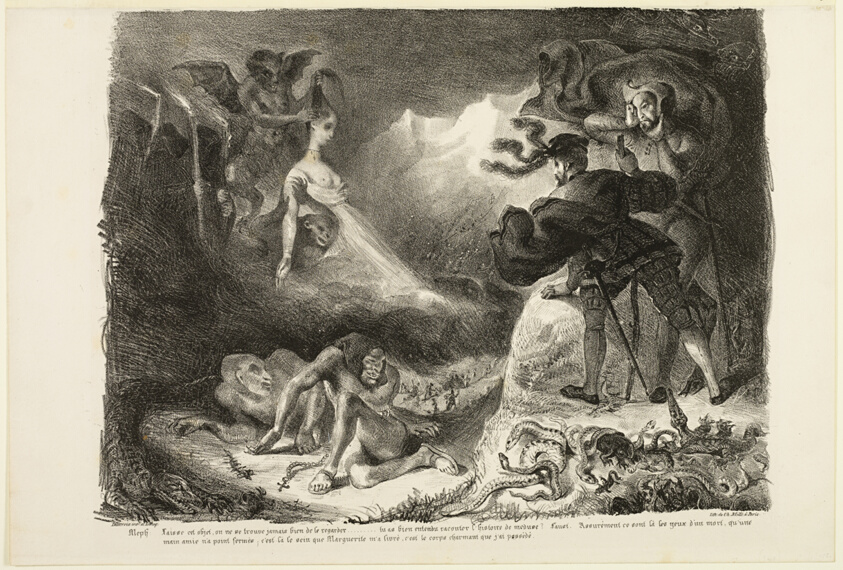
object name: Print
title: Marguerite's Ghost Appearing to Faust, from Faust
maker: Eugène Delacroix (French, 1798-1863)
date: 1828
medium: Lithograph in black on ivory wove paper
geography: France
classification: lithograph; print; prints and drawing